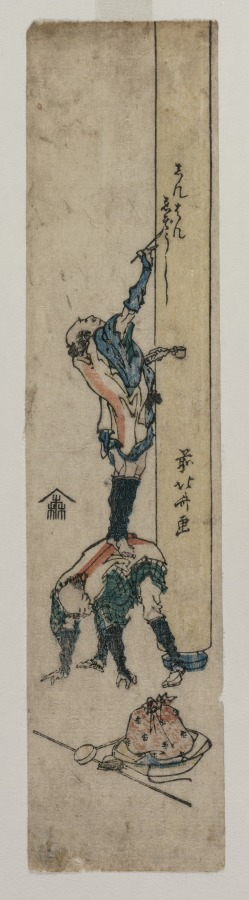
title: Traveler Inscribing a Temple Pillar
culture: Japan, Edo period (1615–1868)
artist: Katsushika Hokusai (Japanese, 1760–1849)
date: c. 1830 or early 1830s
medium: Woodblock print; ink and color on paper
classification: Print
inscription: Signature: Zen Hokusai ga. Publisher: Moriya Jisuke (emblem).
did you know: Pillar prints, or hashira-e (柱絵), are long and narrow Japanese woodblock prints originally intended to decorate wooden pillars.